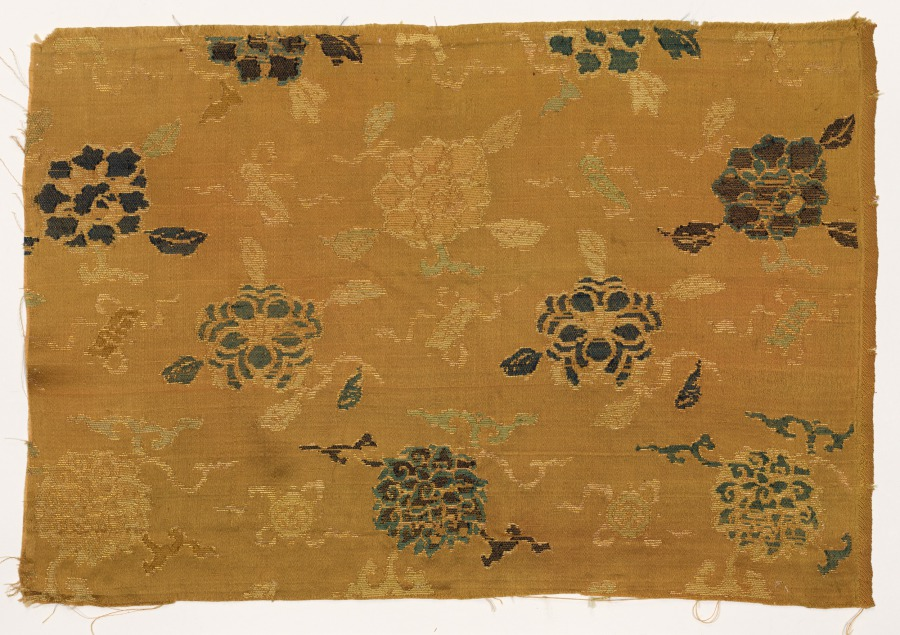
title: Textile Fragment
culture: Japan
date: 1800s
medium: silk, metallic thread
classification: Textile